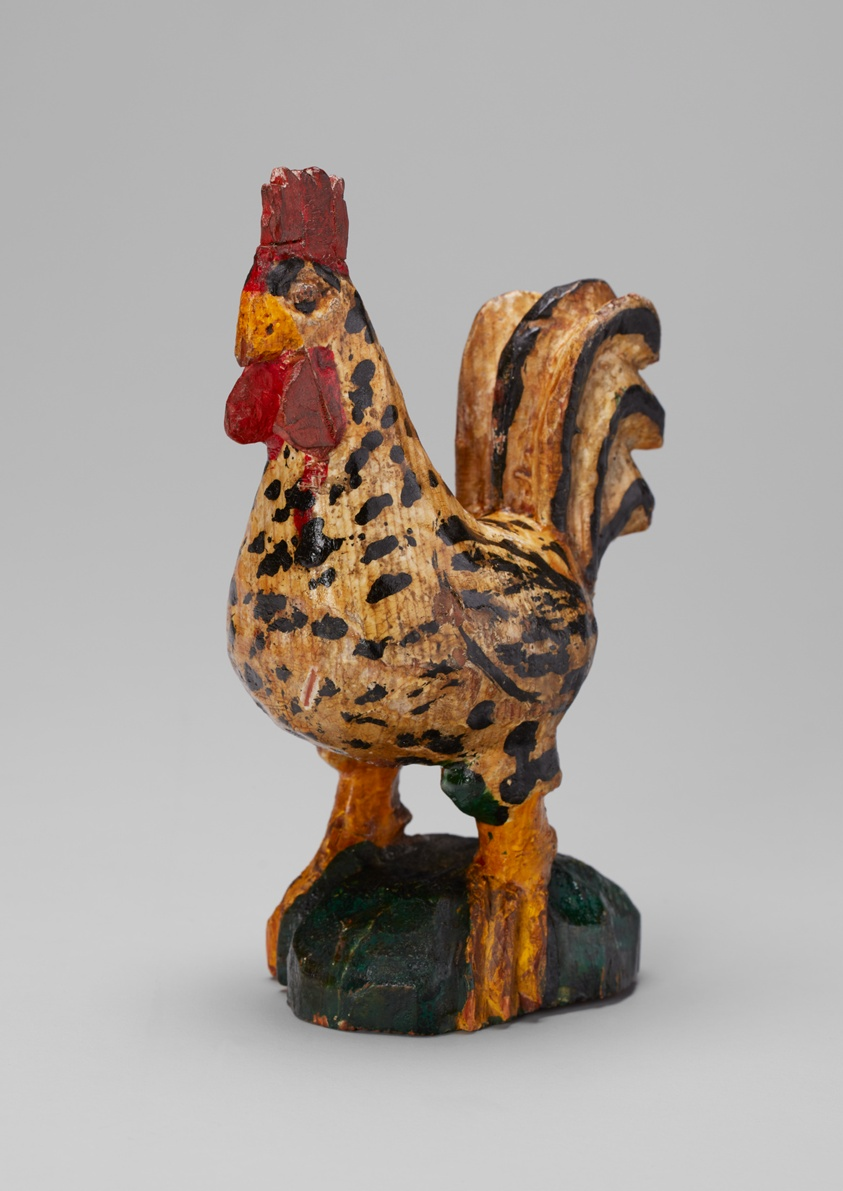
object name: Decorative Arts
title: Rooster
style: Folk Art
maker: Wilhelm Schimmel; American, born Germany, 1817–1890; Cumberland County, Pennsylvania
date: 1870–90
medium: Wood and paint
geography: Pennsylvania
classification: sculpture; american decorative arts; american arts; decorative arts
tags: animals